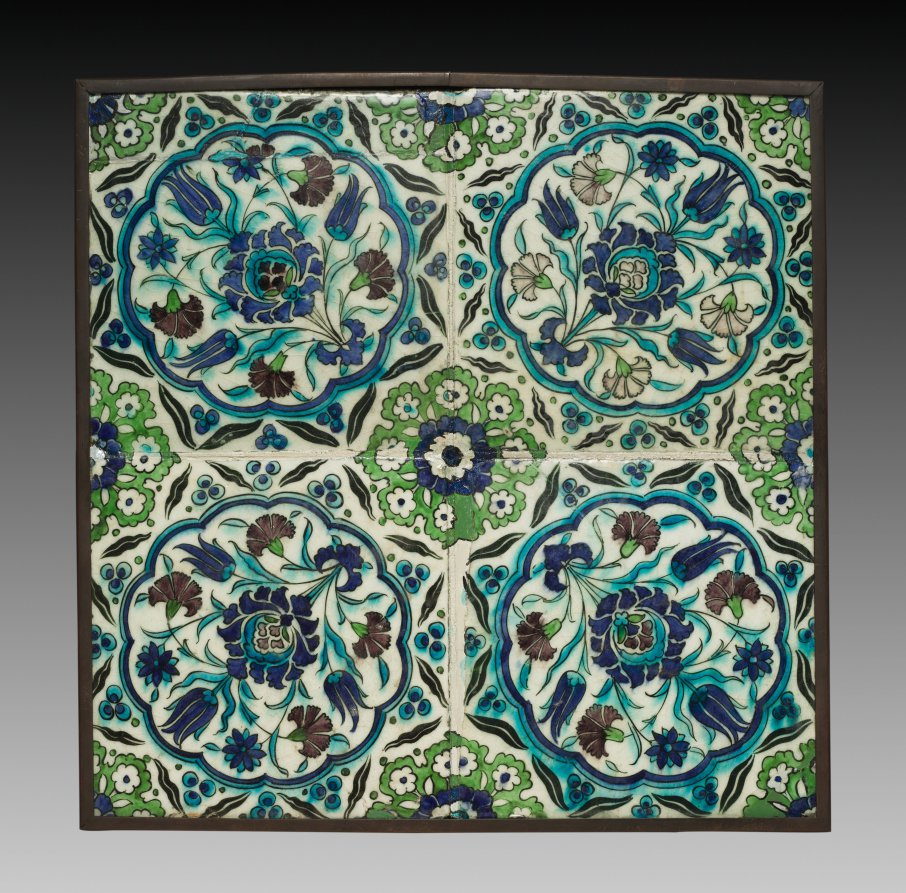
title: Wall Tiles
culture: Turkey (Iznik), Ottoman Period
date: 1600s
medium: fritware with underglaze-painted design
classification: Ceramic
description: These four square tiles are each adorned with a floral spray of tulips, carnations, and a large hybrid palmette, set inside a twelve-lobed circular medallion. It is surrounded by an eight-pointed star made of pairs of wavy lines. Where the four tiles are joined, another complete medallion with a floral motif and a cobalt blue center is formed.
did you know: Iznik was the town which manufactured tiles for imperial buildings of the Ottoman sultans.